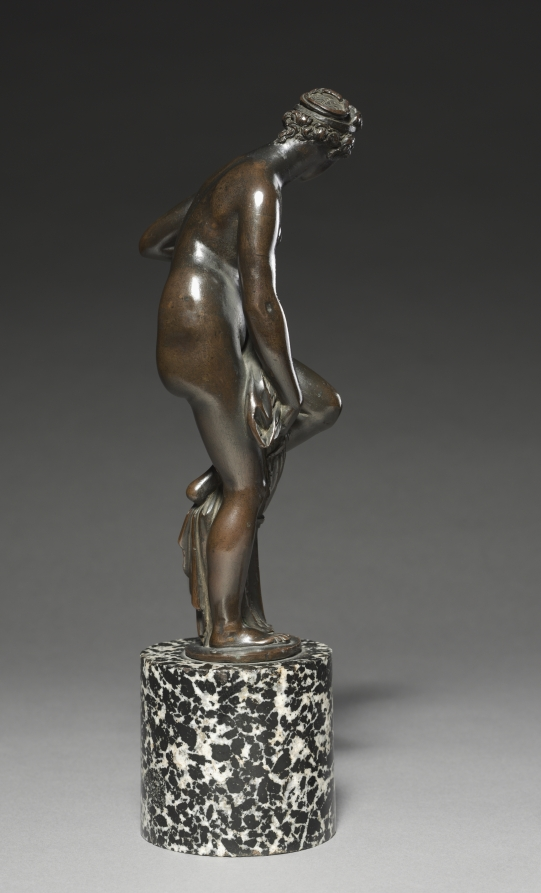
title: Venus after the Bath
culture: Italy, early 17th century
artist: cast possibly by the Workshop of Giambologna (Flemish, active Italy, 1529–1608)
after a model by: Giambologna (Flemish, active Italy, 1529–1608)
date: c. 1600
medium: bronze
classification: Sculpture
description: The statuette’s scale speaks to its likely place in private, intimate settings. The serpentine composition would have encouraged close examination from multiple angles. Compare the complexity of her pose to the relatively static Venus with a Burning Urn (1948.171).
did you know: Giambologna intended his bronze statuettes to be held and touched, to fully appreciate their smooth, elegant forms.